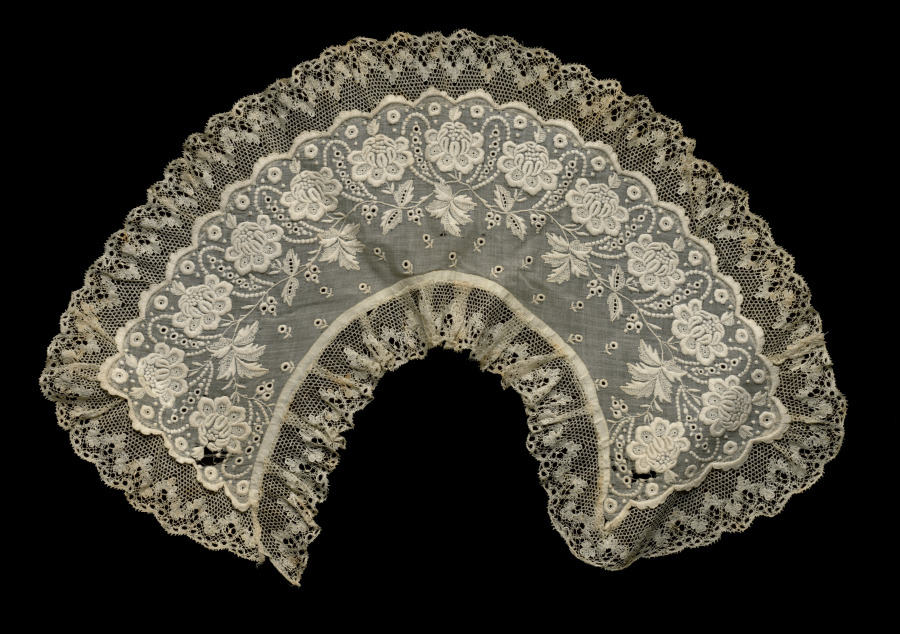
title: Lace Collar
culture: America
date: 1875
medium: Plain weave cotton ground: linen bobbin lace edging and embroidery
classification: Lace